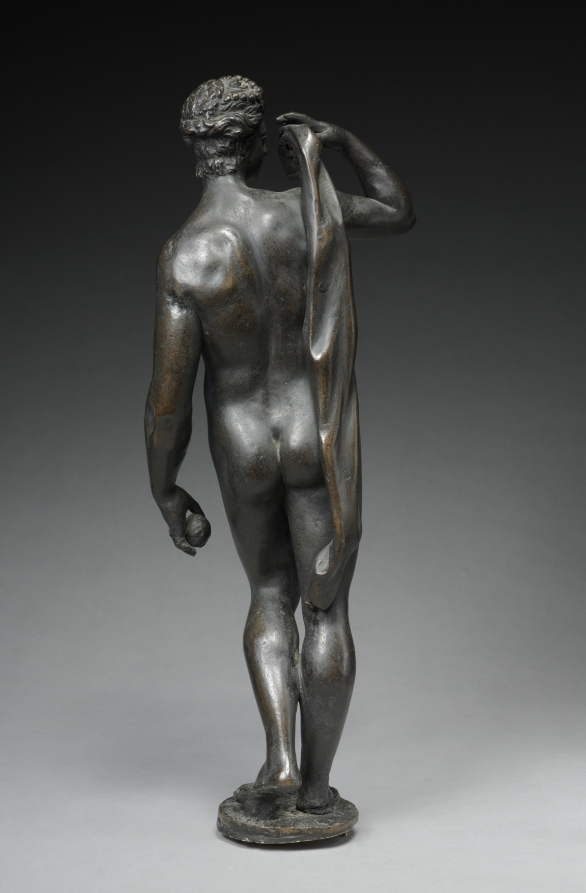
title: Venus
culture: Italy, 16th century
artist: Danese Cattaneo (Italian, 1509–1573)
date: c. 1560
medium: bronze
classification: Sculpture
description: Cattaneo's Venus is reminiscent of the ancient Aphrodite of Knidos by Praxiteles (Greek, c. 375–340 BC), as Venus holds her drapery in her right hand, leaving her body fully exposed. This work recalls Cattaneo's bronze sculptures of goddesses with the unbalanced curvature of the body and elaborately sculpted hair. Along with the hands and feet, the back of the figure is largely unfinished, indicating that it probably originally stood against a wall or in a niche.